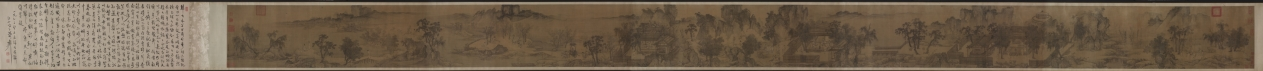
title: Tao Yuanming's Return Home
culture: China, Yuan dynasty (1271-1368)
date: 1300s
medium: Handscroll; ink and slight color on silk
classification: Painting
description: Tao Yuanming's revered poem "Return Home 歸去來辭 (Gui qu lai ci)" powerfully conveys his desire to leave bureaucratic life for the simplicity and authenticity of nature. This sentiment has deeply resonated with generations of Chinese scholars, making it a popular theme in paintings. This handscroll uses continuous narrative depicting Tao in multiple scenes from the poem. Starting on the right, the poet travels to his home. His children wait by the gate, while his wife pauses to tidy her hair before welcoming him. Then, free from the burdens of official service, Tao spends time in both nature and his cottage, where he can again enjoy wine, music, and books.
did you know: Poet Tao Yuanming 陶淵明 (c. 365–427 CE) returned to a secluded life instead of pursuing a civil service career.